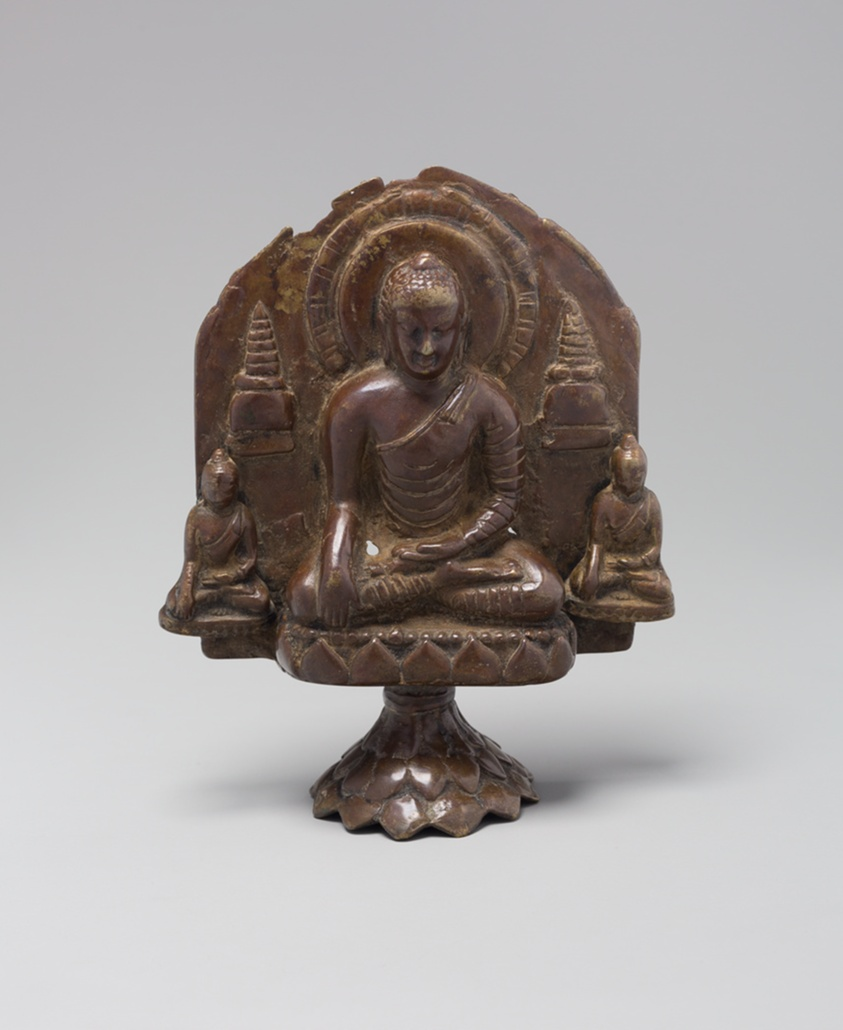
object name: Sculpture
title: Buddha Calling the Earth to Witness (Bhumisparshamudra)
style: South Asian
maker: India; Eastern India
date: Pala period, 8th/10th century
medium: Bronze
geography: Eastern India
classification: bronze; metal; sculpture; asian art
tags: Buddha